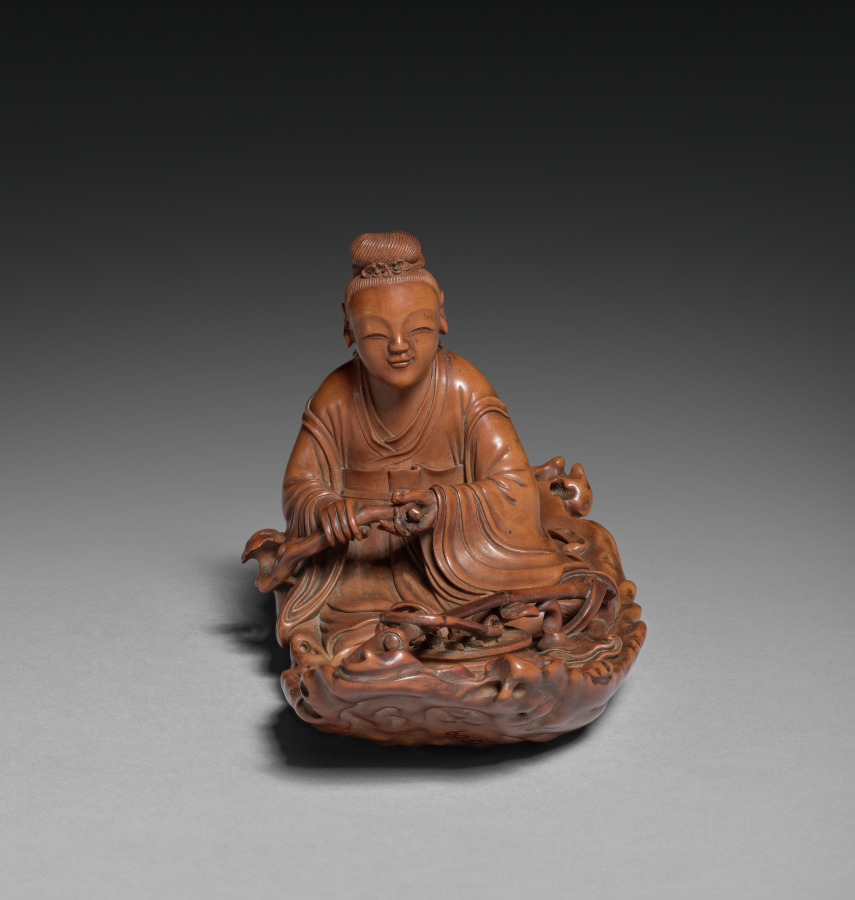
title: Figure of Daoist Immortal He Xiangu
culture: China, Qing dynasty (1644-1911)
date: 1700s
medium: Boxwood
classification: Wood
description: He Xiangu is one of the Eight Immortals in the Daoist pantheon. She was thought to have been a real person who lived in the Tang dynasty, originally named He Qiong. As a teenager, she was instructed in a dream to eat powdered mica to become immune from death and to vow to remain unmarried. She did so and became an enlightened practitioner of Daoism. In this delicate carving, He Xiangu is placidly seated in a gnarled and knotty wooden raft amid green-tinted ivory waves. In front of her rests a bamboo basket filled with objects associated with Daoist immortality, and she holds a branch of lingzhi fungus like an oar.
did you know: The lingzhi she holds is a woody mushroom often used in traditional Chinese medicine and associated with immortality.